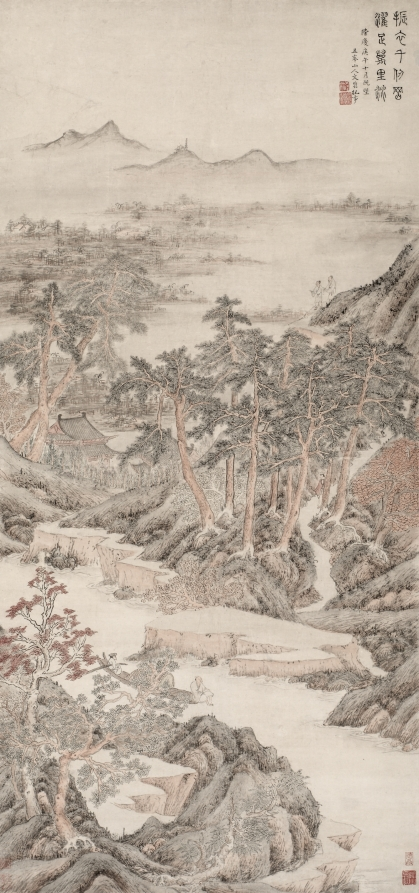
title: Washing the Feet (from the Dusty World)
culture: China, Ming dynasty (1368–1644)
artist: Wen Boren (Chinese, 1502–1575)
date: 1570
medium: Hanging scroll mounted on a panel; ink and color on paper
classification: Painting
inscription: Artist's inscription, signature, and 4 seals: Shaking one's clothes on a thousand-jen peak,/ Washing one's feet in a ten-thousand-li stream. In the gengwu year of the Longqing era [1570], fifteenth day of the tenth month, Wufeng shanren, Wen Boren recorded a special occasion. [2 seals] Wufeng shanren; Wen Boren Te-ch'eng chang. [2 seals, lower right corner] Te-ch'eng; She-shan chang. trans. HR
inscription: 2 additional seals of Zhang Heng 張珩 (1915-1963)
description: A scholar on a boat in the middle ground bathes his feet in the cooling stream. The vast river scene is depicted from a high viewing point. The motif of a scholar washing his feet illustrates the phrase, “When the waters of the Canglang are clear, I wash my capstrings. When the waters of the Canglang are muddy, I wash my feet [only]” (from Songs of Chu, written before 256 BC). The passage evokes the image of the virtuous scholar-official who avoids government service when the ruler is corrupt (the rivers are muddy) and resumes service (washing my capstrings) when the waters are clear. Whether the artist here alludes to unfavorable times of government is not clear.